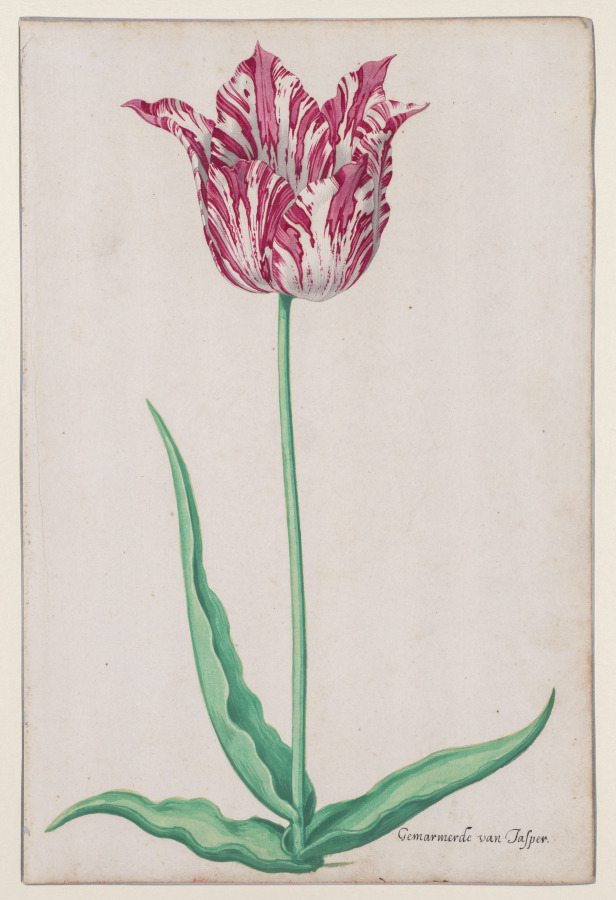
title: Study of a Tulip (Gemarmerde van Jasper)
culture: Netherlands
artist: Pieter Holsteyn II (Dutch, c.1612–1673)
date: c. 1645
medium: brush and watercolor in crimson, gray, and green over traces of charcoal on antique laid paper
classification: Drawing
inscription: recto, Gemarmerde van Jasper. in black ink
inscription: brown ink inscription in different hand cut off, lower border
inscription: verso, Morel and 7/79/36 and 40 and 42 and 36 in graphite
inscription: watermark: pelican within wreath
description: This image of a tulip was made as part of a tulip book used as a grower’s marketing tool during the so-called tulip mania, a speculative bubble in 17th-century Holland, when ten tulip bulbs could cost more than a stately Amsterdam canal house. The striations on the tulip, which were caused by a virus in the bulb, made it especially valuable. Pieter Holsteyn II was one of many artists in the Netherlands at the time who specialized in botanical illustration. This tulip's Dutch name, inscribed on the sheet, translates roughly to "marriage of jasper stone."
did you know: In 17th-century Holland, some tulip bulbs were as expensive as a stately Amsterdam canal house!